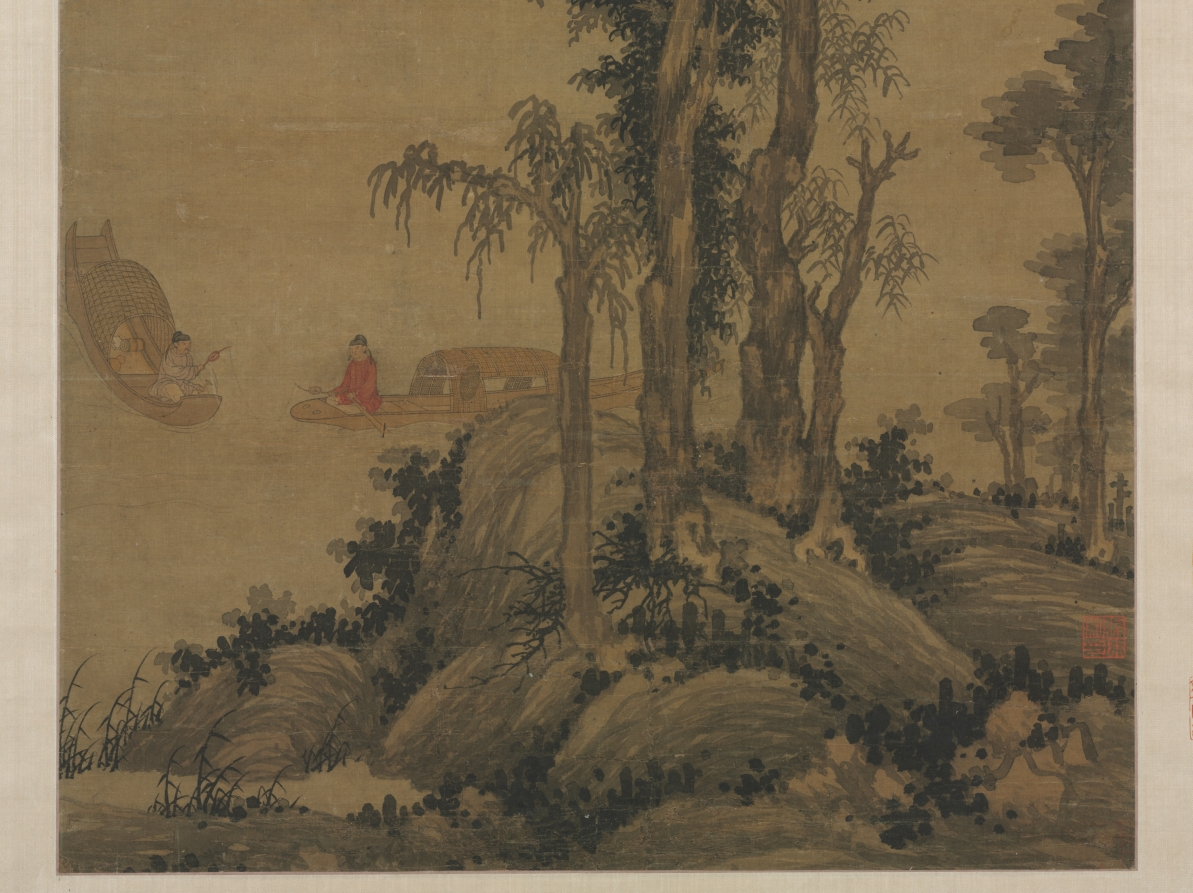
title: Fishermen-Hermits in Stream and Mountain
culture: China, Yuan dynasty (1271-1368)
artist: Zhao Yong (Chinese, c. 1289-c. 1362)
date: 1300s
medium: Hanging scroll; ink and color on silk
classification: Painting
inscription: 仲穆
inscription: [印] 吳興張氏圖書之記; [印] 心賞; [印] 張珩私印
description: In this typical southern two shores divided by a river composition, two fishermen, each seated in the stern of his covered houseboat, troll their hooks in the swirling water, holding short rods fitted with spooling reels. Zhao Yong was a son of the southern calligrapher and statesman Zhao Mengfu, who, like his father was a scholar-official in the Mongol-Yuan government. As public servants of the Yuan state and administration, scholar-artists like the Zhaos delighted in paintings that pictured them in nature as fishermen amid vistas of Jiangnan, which they considered their home.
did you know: The composition of two shores divided by a river was mostly famously associated with the Yuan painter Ni Zan.